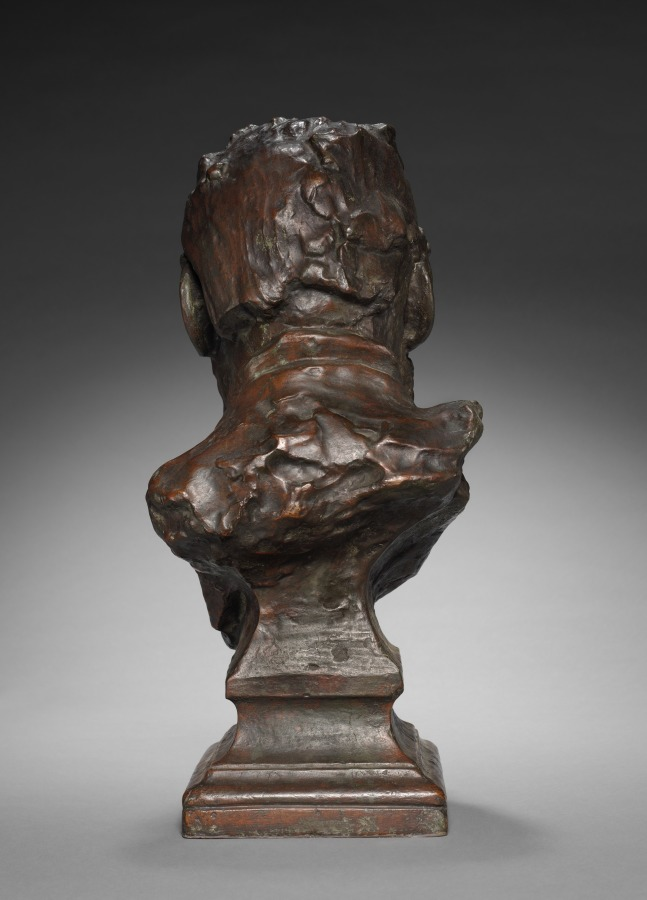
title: Bust of Victor Hugo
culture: France, 19th century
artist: Auguste Rodin (French, 1840–1917)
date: 1883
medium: bronze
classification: Sculpture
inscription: Signed beneath fold of drapery to left: "A. Rodin"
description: Unlike most of Rodin’s portraits, the bust of Victor Hugo (1802–1885) was made from memory because the famous French writer refused to sit for the artist. Among Hugo’s best-known novels are The Hunchback of Notre Dame (1831) and Les Misérables (1862).